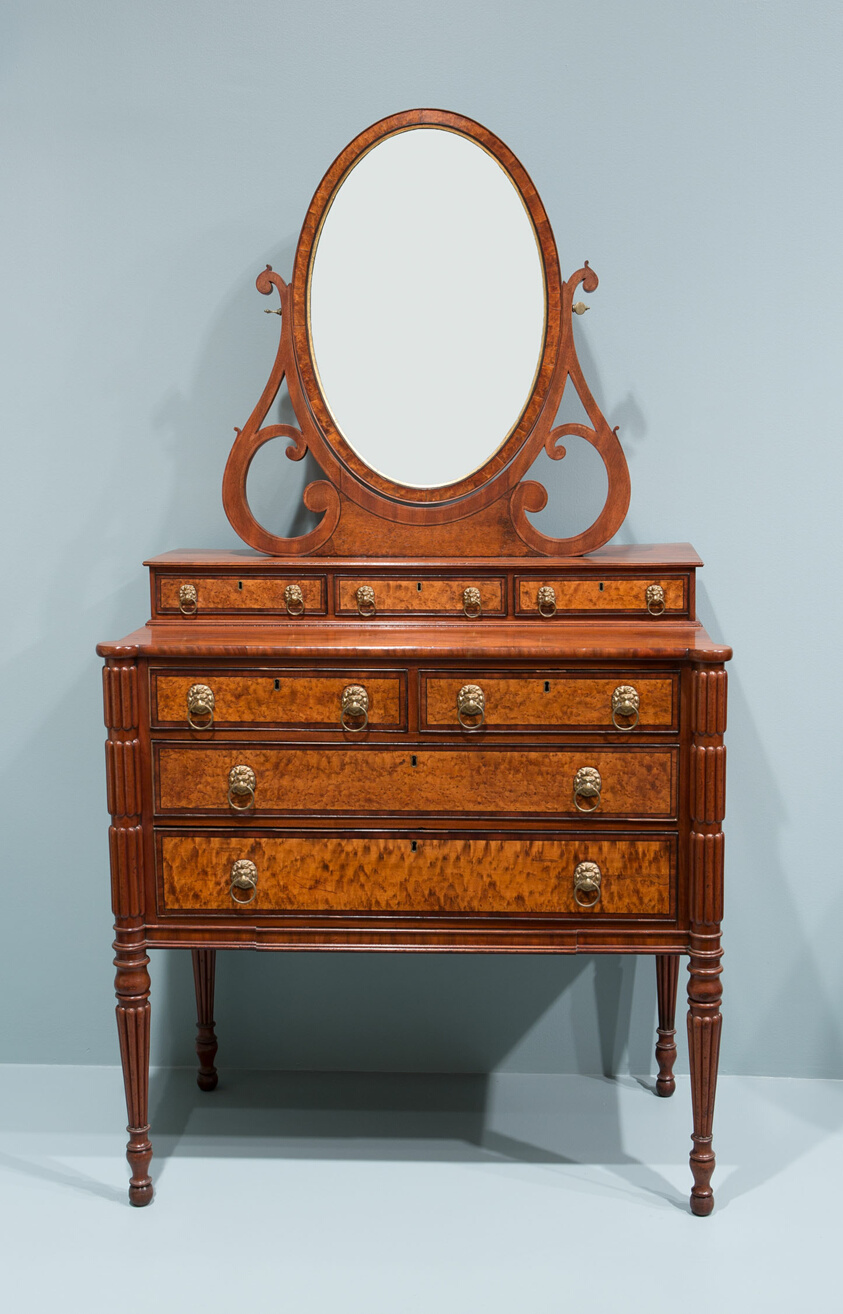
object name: Furniture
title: Chest of Drawers with Dressing Glass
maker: Attributed to the workshop of Thomas Seymour (active 1794–1843); Boston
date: c. 1815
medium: Mahogany with mahogany veneer, maple veneer, white ash, and white pine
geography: Boston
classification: case furniture; furniture; american decorative arts; american arts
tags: furniture